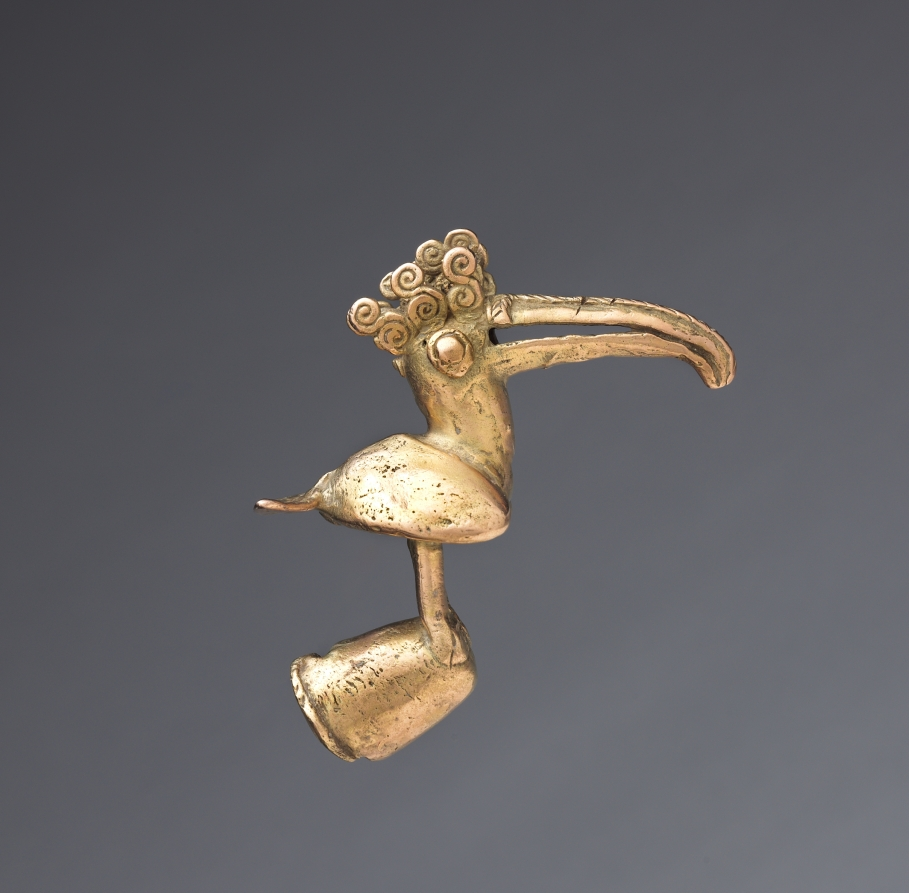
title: Staff Head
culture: Colombia, Sinú style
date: 400–1000 CE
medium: cast gold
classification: Metalwork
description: These finials probably fit over the ends of wooden staffs, emblems of rank. Unique to the Sinú area are finials with an image, often a bird, at a right angle to the base. This orientation suggests that the finials served as the finger grips of ceremonial spear throwers.